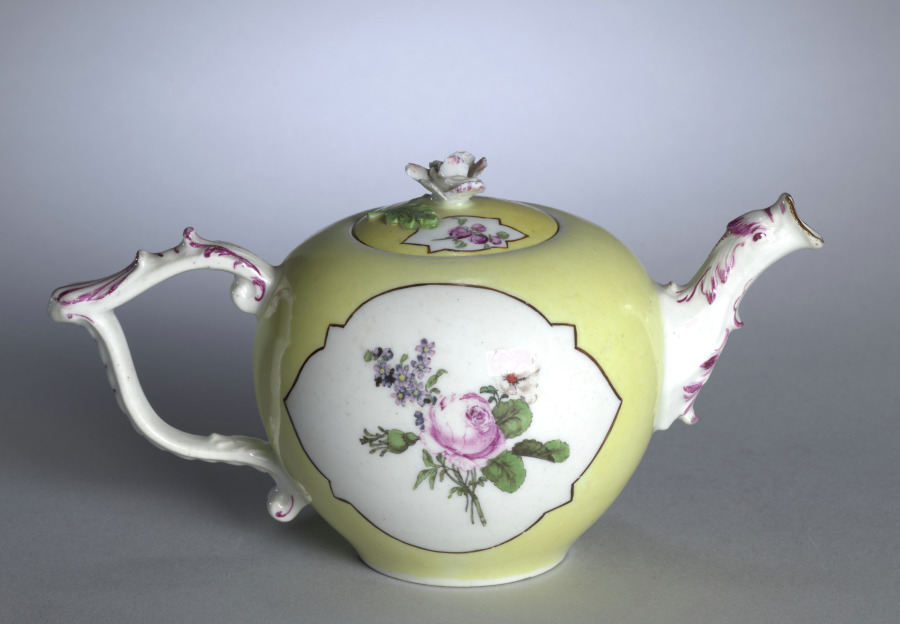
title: Teapot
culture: Germany, Meissen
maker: Meissen Porcelain Factory (German, est. c. 1710)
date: c. 1750–70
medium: porcelain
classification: Ceramic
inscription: Mark on the bottom that looks like two swords crossing, with a small V intersecting.